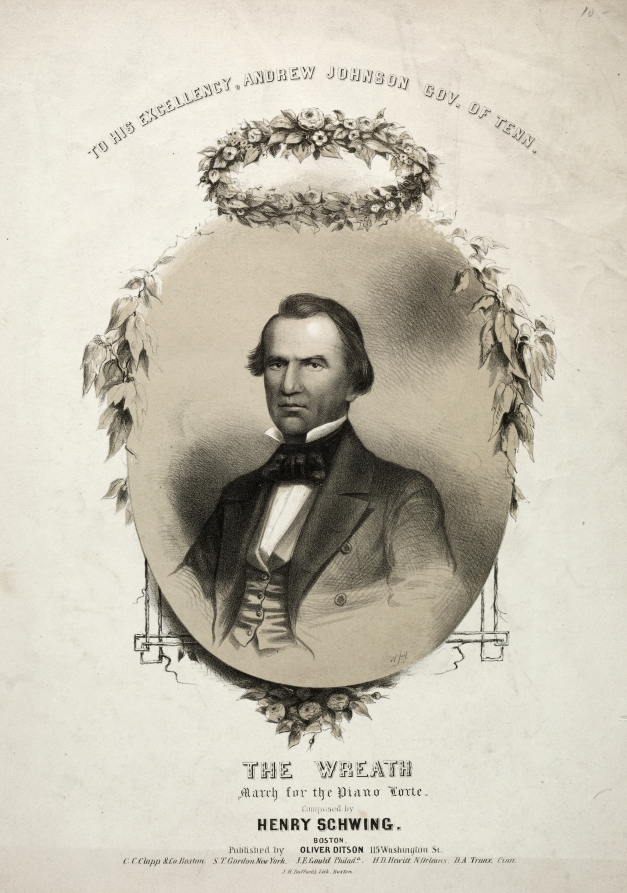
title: The Wreath - Sheet Music Cover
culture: America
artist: Winslow Homer (American, 1836–1910)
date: c. 1853–57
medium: lithograph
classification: Print